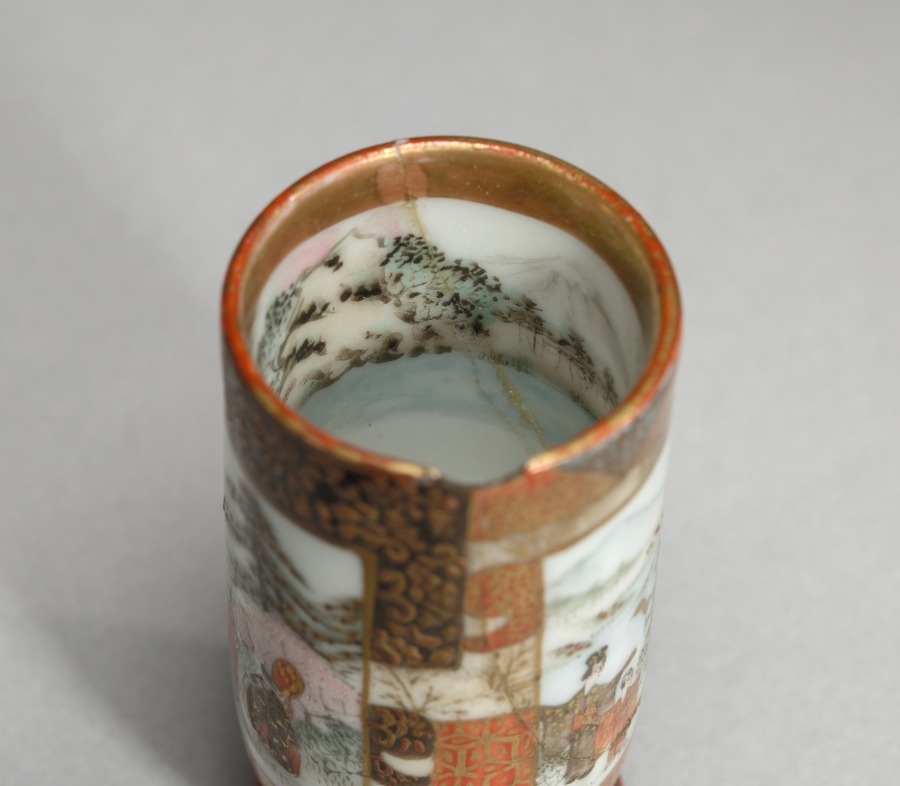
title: Miniature Vase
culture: Japan, Edo period (1615–1868) to Meiji period (1868–1912)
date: 1800s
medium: overglaze porcelain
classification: Ceramic